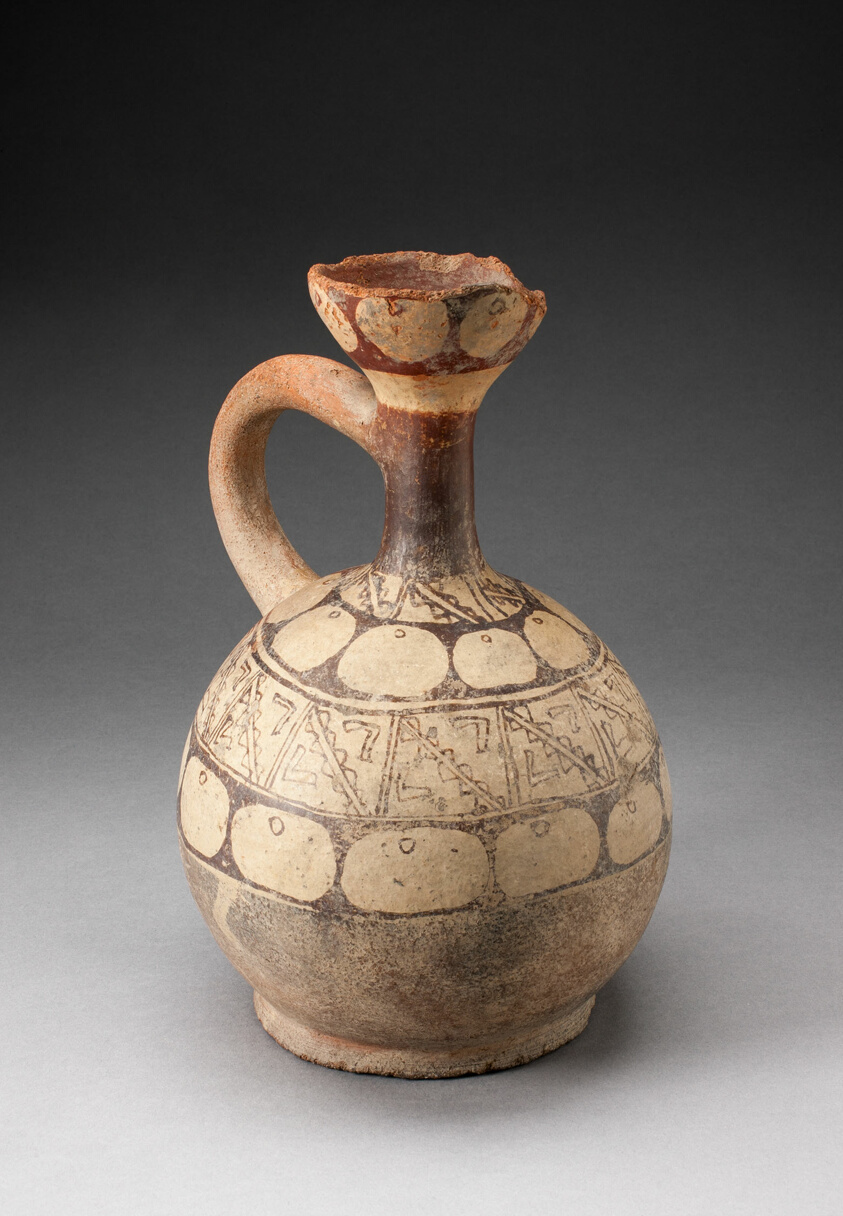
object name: Vessel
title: Single-Handled Jar with Geometric Motifs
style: moche, mochica v, mochica, early intermediate period, Pre-Columbian, americas, Arts of the Americas, andean, andes, south american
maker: Moche (North coast, Peru)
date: 100 BCE–500 CE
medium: Ceramic and pigment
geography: Peruvian North Coast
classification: earthenware; ceramics; vessel; art of the americas